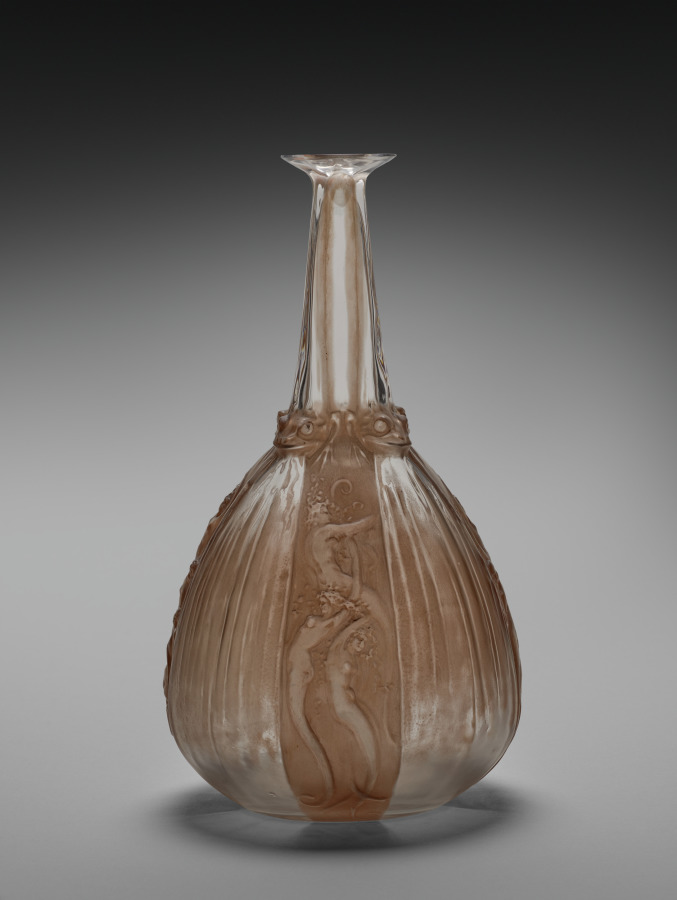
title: Mermaids and Frogs Decanter (Carafe sirènes et grenouilles)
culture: France, 20th century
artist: René Lalique (French, 1860–1945)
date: 1917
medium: glass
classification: Glass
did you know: The title of this work translates to mermaids and frogs carafe.